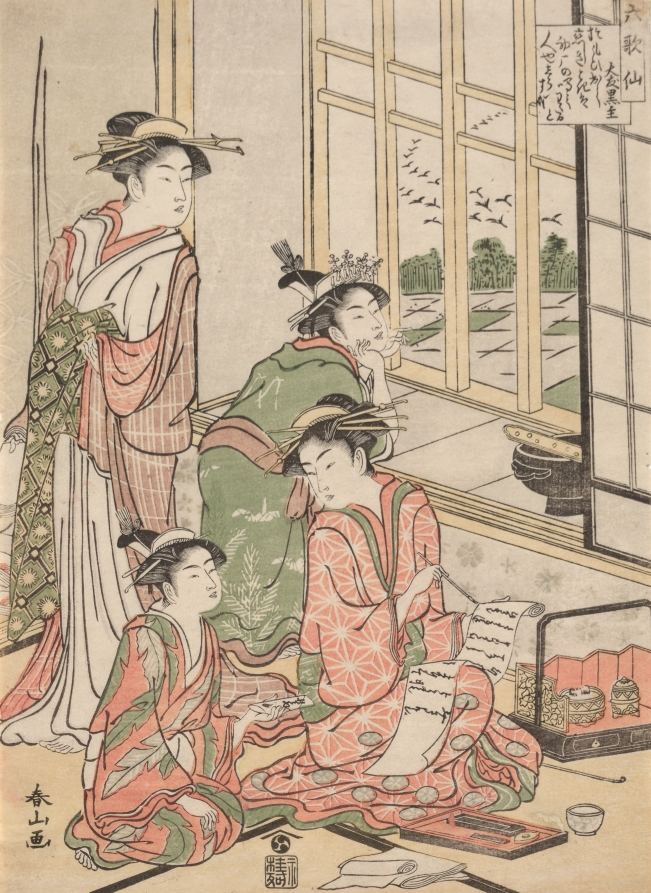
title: Courtesans at Leisure from the series The Six Immortal Poets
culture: Japan, Edo period (1615–1868)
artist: Katsukawa Shunzan (Japanese, active c. 1782–98)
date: early 1780s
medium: color woodblock print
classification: Print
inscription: Signature: Shunzan ga Publisher: Nishimuraya Yohachi (Eiju han, emblem)